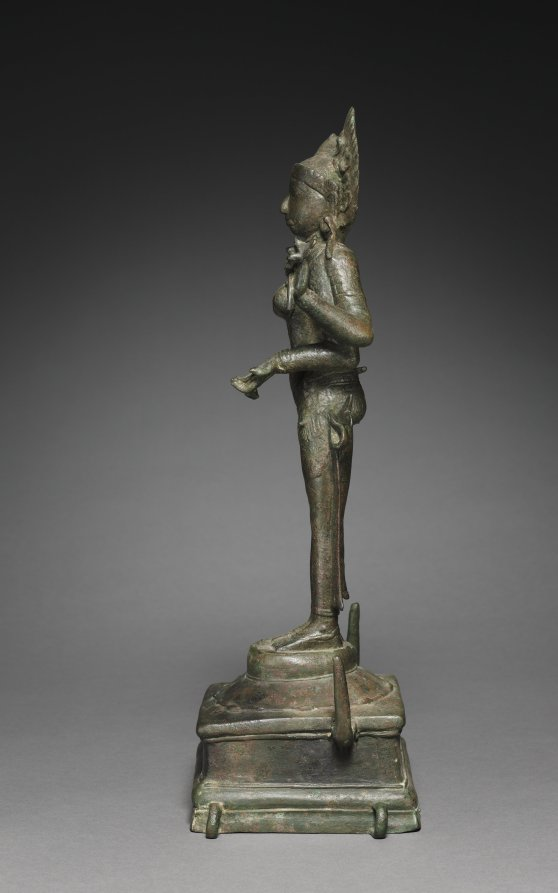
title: Kali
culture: South India, Tamil Nadu, Chola period (900-13th century)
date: 900s–1000s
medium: bronze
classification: Sculpture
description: The female aspect of Shiva, the goddess Parvati, has her own cycle of myths, and she herself emanates into different forms. Some branches of Hinduism consider the goddess to be the supreme creator divinity herself, who generated all the other gods, including Shiva. This bronze sculpture could have been affiliated with either branch. Kali is the wrathful form of the goddess generated in the midst of a battle with a demon that the gods failed to conquer. Kali was to drink his blood before any drop fell to ground, or else a new demon would instantly be generated. The demons are metaphors for human vices, such as egotistic pride and arrogance.